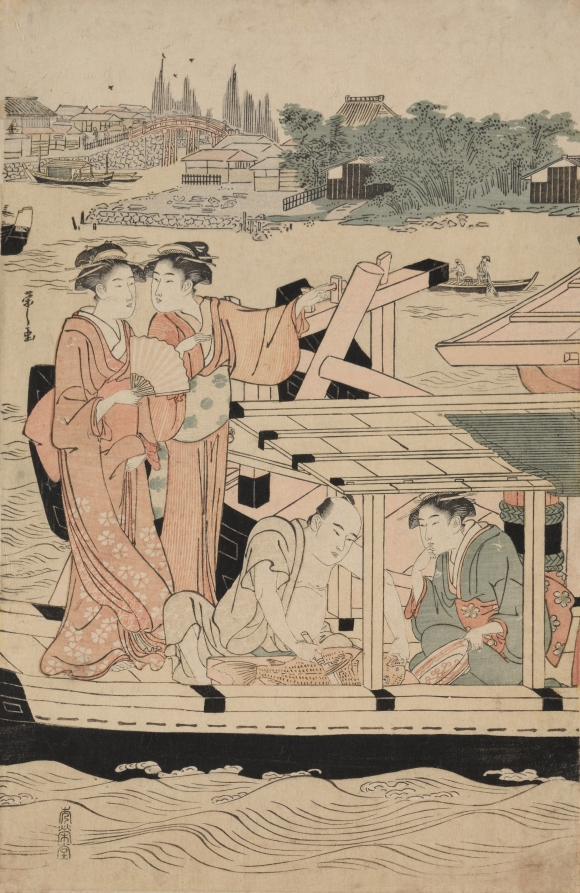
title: Leftmost Print from Pleasure Boats on the Sumida River beneath Shin-Ōhashi Bridge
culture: Japan, Edo period (1615–1868)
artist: Chōbunsai Eishi (Japanese, 1756–1829)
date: c. 1792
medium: woodblock print from a pentaptych; ink and color on paper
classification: Print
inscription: Signature: Eishi ga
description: Eishi was both a painter and printmaker. His figures are characterized by elegant lines and flowing drapery.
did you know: This is the leftmost print of a composition comprising five prints, but the museum has only two of them.